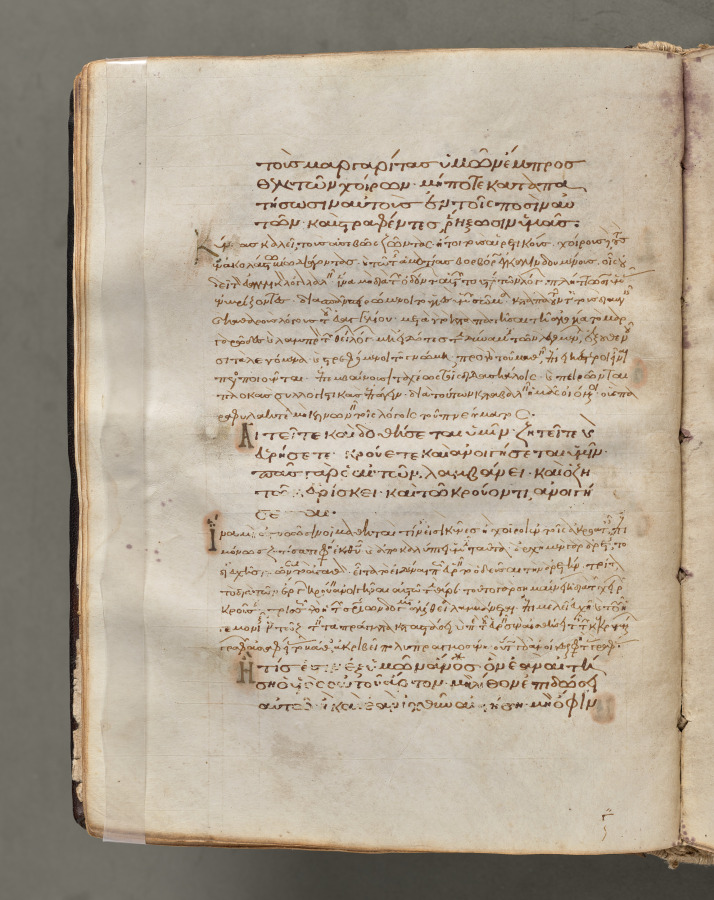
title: Text, folio 29 (verso), from a Gospel Book with Commentaries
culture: Byzantium, Constantinople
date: c. 1000–1100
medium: ink, tempera, and gold on vellum; leather binding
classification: Bound Volume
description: Each of the four gospels in this book opens on a page with brilliantly illuminated borders depicting the author of the text as well as birds—principally peacocks, symbols of the immortality of the soul—and fountains, representing the fountain of life and the salvation of the soul. This volume consists of 428 leaves with texts in Greek. Its level of sophistication suggests that it was probably written and decorated in a monastery in Constantinople.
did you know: Gospel books were carried in procession through Byzantine churches.